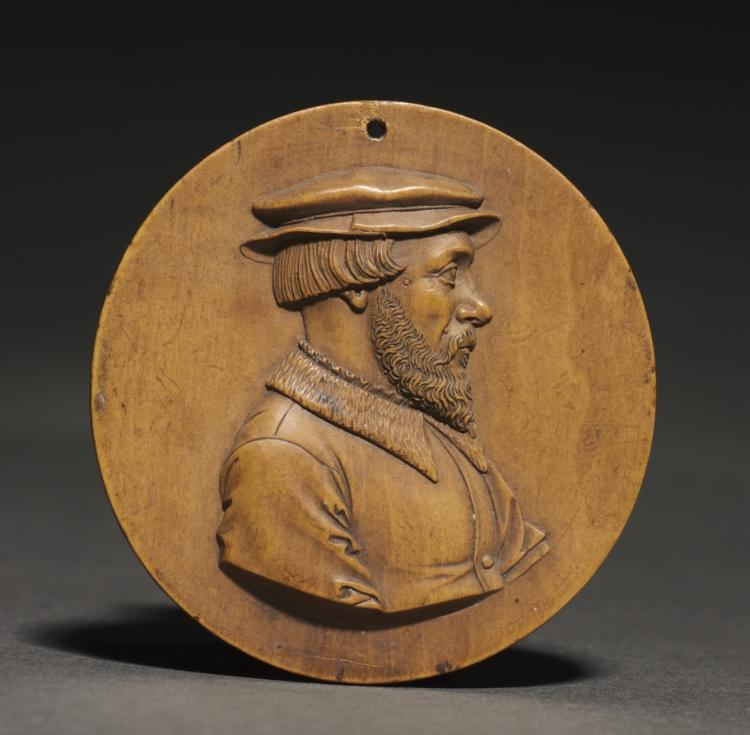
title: Portrait of a Man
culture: Germany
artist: Christoph Weiditz (German, c. 1500–1559)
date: 1523–1536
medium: boxwood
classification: Sculpture